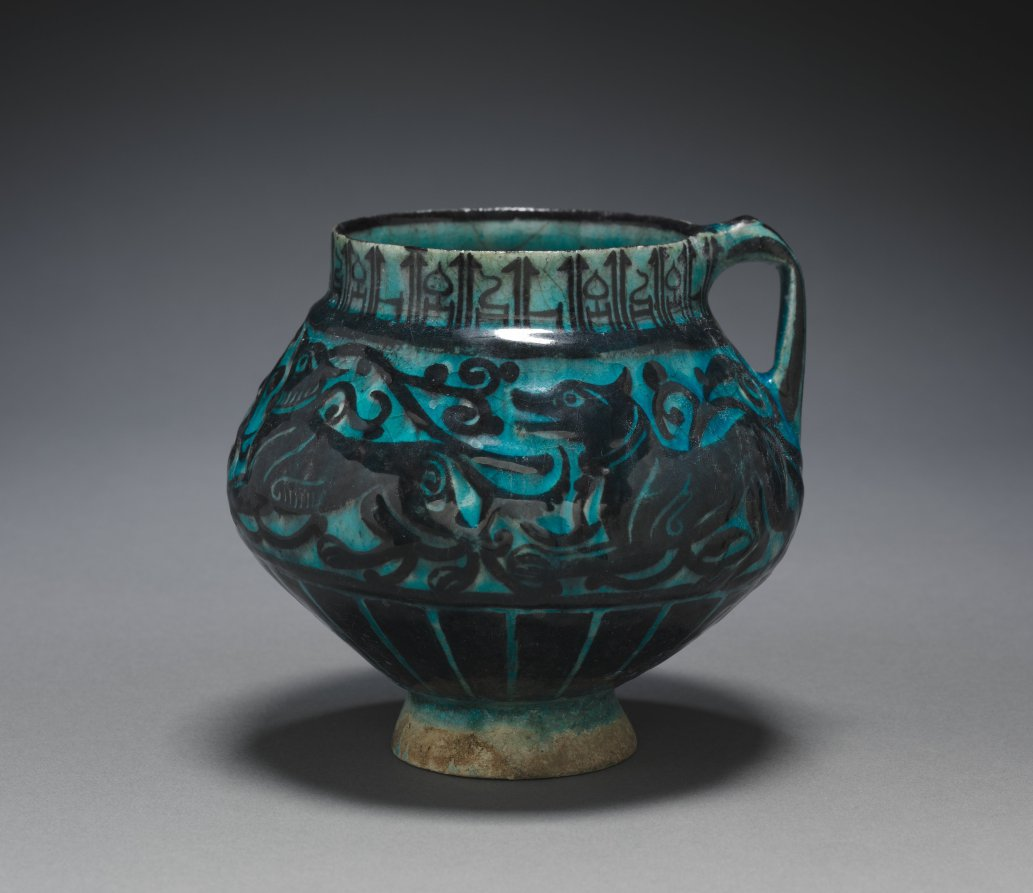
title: Jug with Running Animals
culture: Iran, probably Kashan, Seljuq period of Iran (1037–1194)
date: 1150–1220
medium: fritware with design in carved and underglaze-painted slip ("silhouette" ware)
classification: Ceramic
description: "Silhouette" ware continues the tradition of painting with slip (liquefied clay) directly on the white body beneath the glaze. On this jug, thick black slip was applied and then carved with a knife to create the design of running animals and pseudo-script.